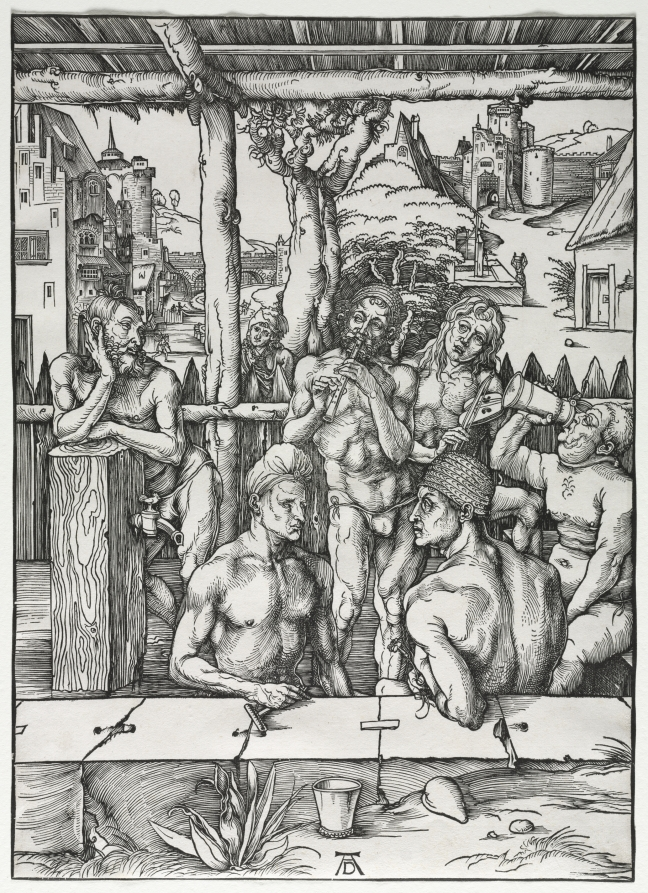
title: The Men's Bath House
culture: Germany, late 15th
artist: Albrecht Dürer (German, 1471–1528)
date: c. 1496–97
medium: woodcut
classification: Print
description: Albrecht Dürer’s depiction of men relaxing in a public bath house was unusual in the early 1500s because it showed nudity without an accompanying mythological or biblical narrative. The print showcases Dürer’s ability to depict the male figure in various inventive poses and may feature portraits of some of his friends. Meant to be studied closely, the image includes visual puns such as the faucet placed near the man’s groin at left. The popularity of the print during Dürer’s lifetime may relate to the 1496 closure of the public bath in his hometown of Nuremberg to prevent a syphilis outbreak.